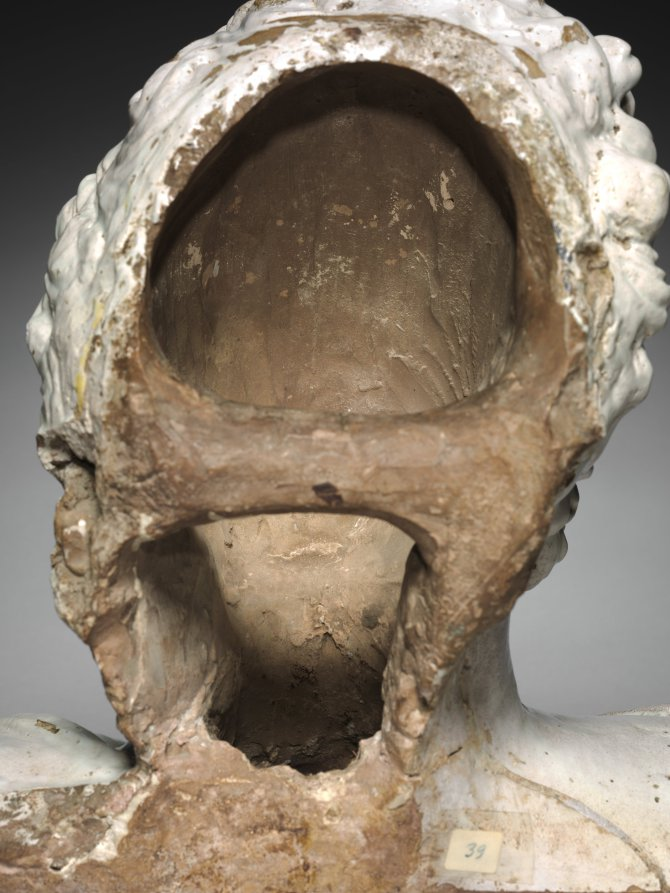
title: Bust of a Classical Hero or Emperor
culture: Italy, 16th century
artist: Girolamo della Robbia (Italian, 1488–1566)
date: early to mid 16th century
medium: glazed terracotta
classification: Sculpture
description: This bust most likely represents an emperor or condottiere from classical antiquity, and probably formed part of a series of classical heads. Such groups of worthies were featured as decorative schemes in the studioli and architectural projects of Renaissance statesmen. Attesting to the sophistication of their learned patrons, these busts also provided the opportunity for artists to explore the contemporary stylistic relevance of classical portraiture—a source of fascination and inspiration for Florentine sculptors of this period.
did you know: Head-and-shoulders portraits, known as busts, were popular from Roman times.